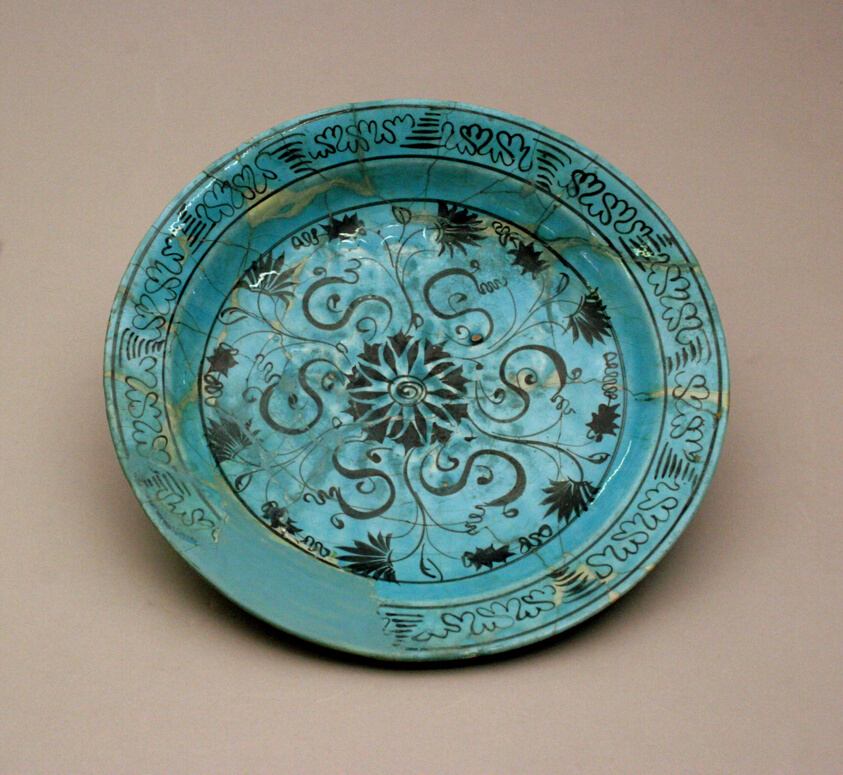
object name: Ceramics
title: Dish with Floral Motifs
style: kashan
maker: Iran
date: Safavid dynasty (1501–1722), 16th century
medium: Fritware painted in black under a transparent turquoise glaze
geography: Iran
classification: ceramics; asian art; decorative arts